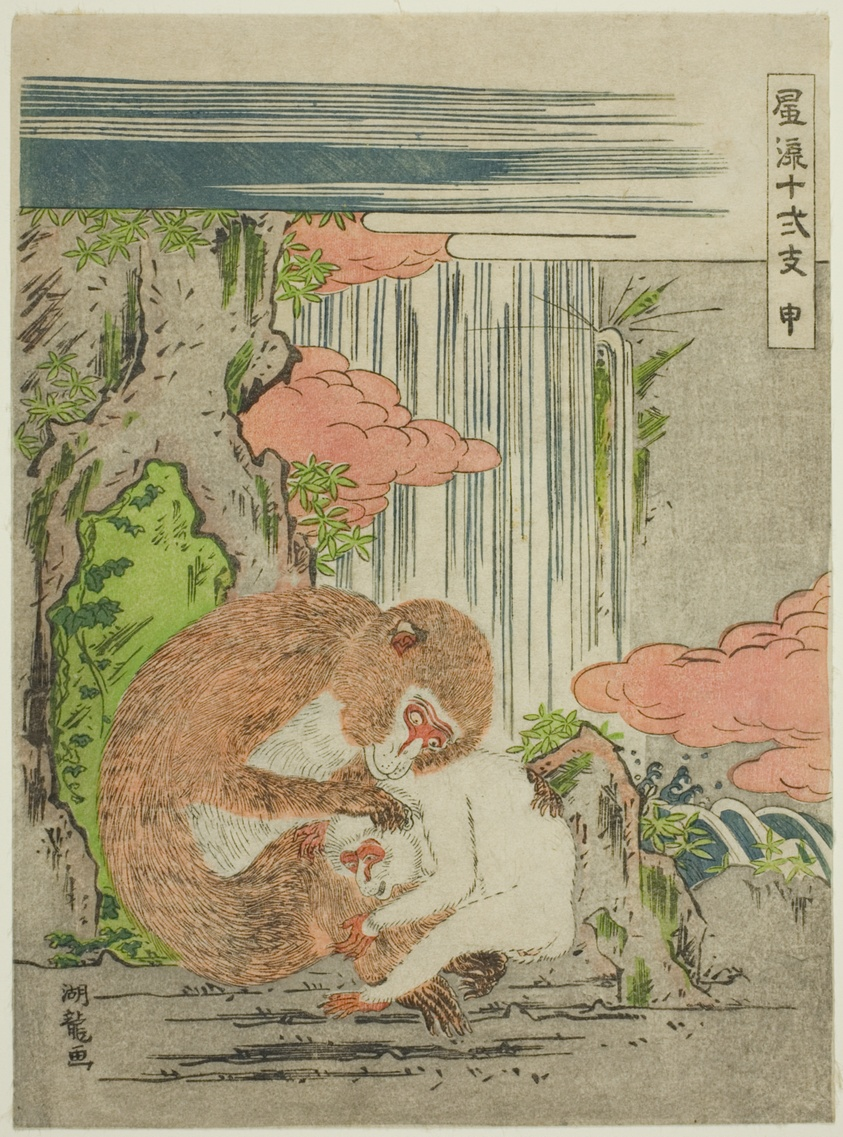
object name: Print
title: Monkey (Saru), from the series "Fashionable Twelve Signs of the Zodiac (Furyu juni shi)"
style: Japanese (culture or style)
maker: Isoda Koryusai (Japanese, 1735-1790)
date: c. 1773/75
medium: Color woodblock print; chuban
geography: Japan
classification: woodblock print; print; asian art